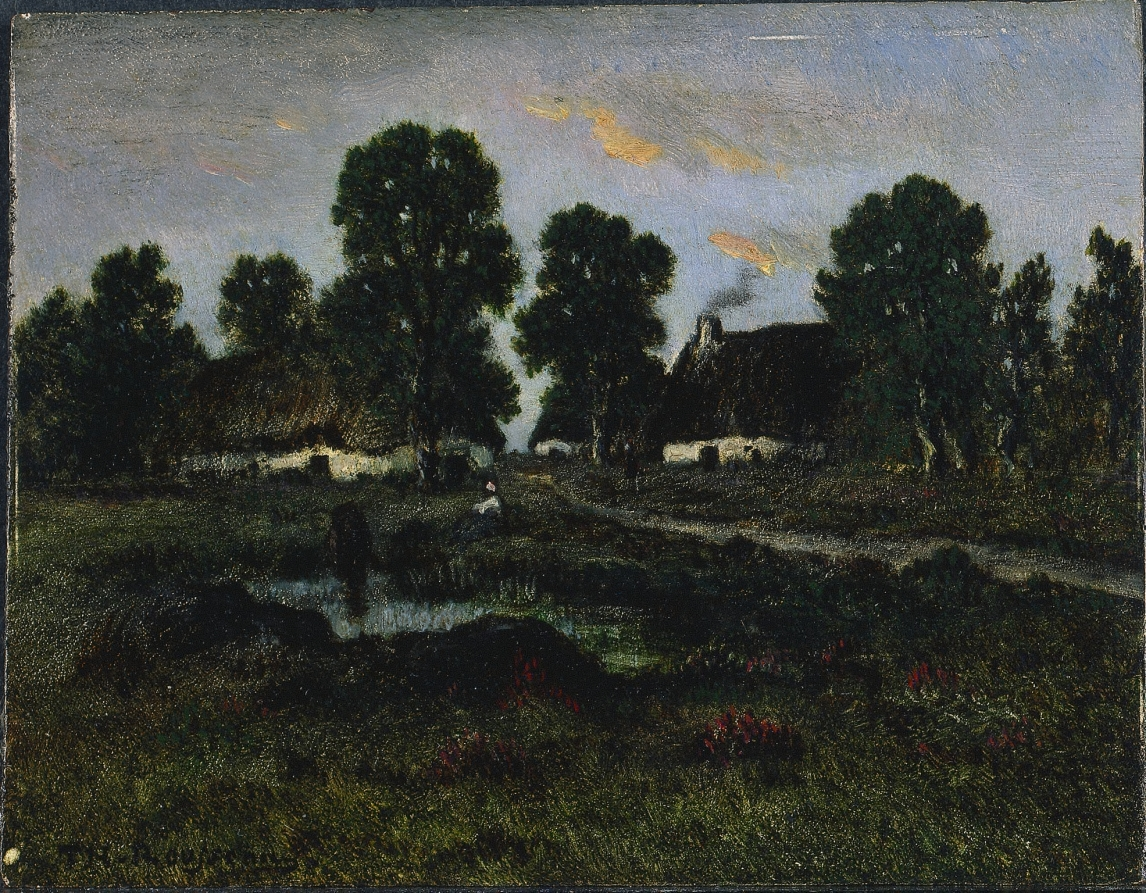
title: Cottages Near Larchant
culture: France, 19th century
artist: imitator of Théodore Rousseau (French, 1812–1867)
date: not dated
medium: oil on wood panel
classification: Painting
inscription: Signed lower left: TH. Rousseau